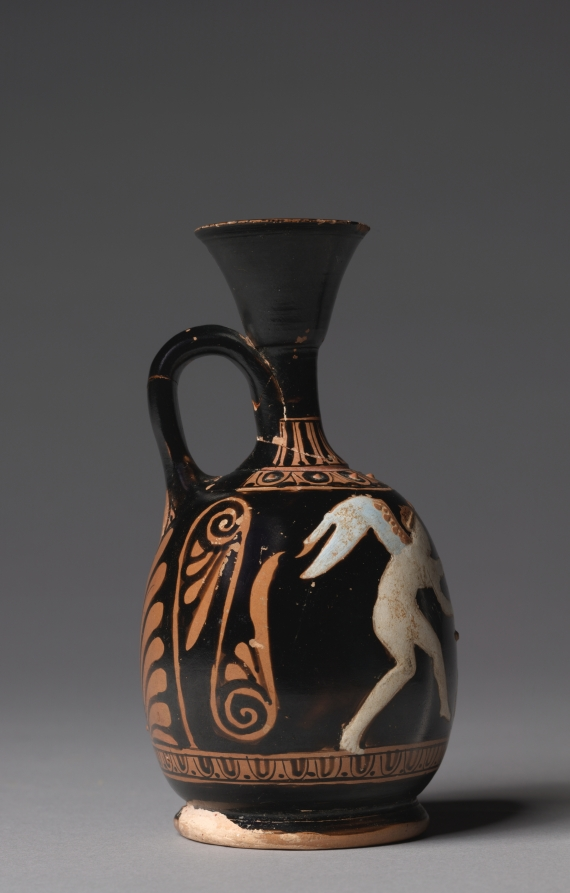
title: Red-Figure Squat Lekythos (Oil Vessel): Eros and Woman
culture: Greek, Attic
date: c. 400–380 BCE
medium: ceramic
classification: Ceramic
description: This miniature oil vessel dates to the early fourth century BC, a time when red-figure vase painters become more liberal in the use of added white and other colors. Here, both Eros and the woman he pursues have white skin, with blue adorning her garment and his wings, and light brown coloring the added clay used for their jewelry, headbands, and the fronts of his wings. A large red-figure palmette, flanked by tendrils and half-palmettes, occupies the back of the vase.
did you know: Added clay pellets help to define the figures’ jewelry and other elements, including the ornament above.